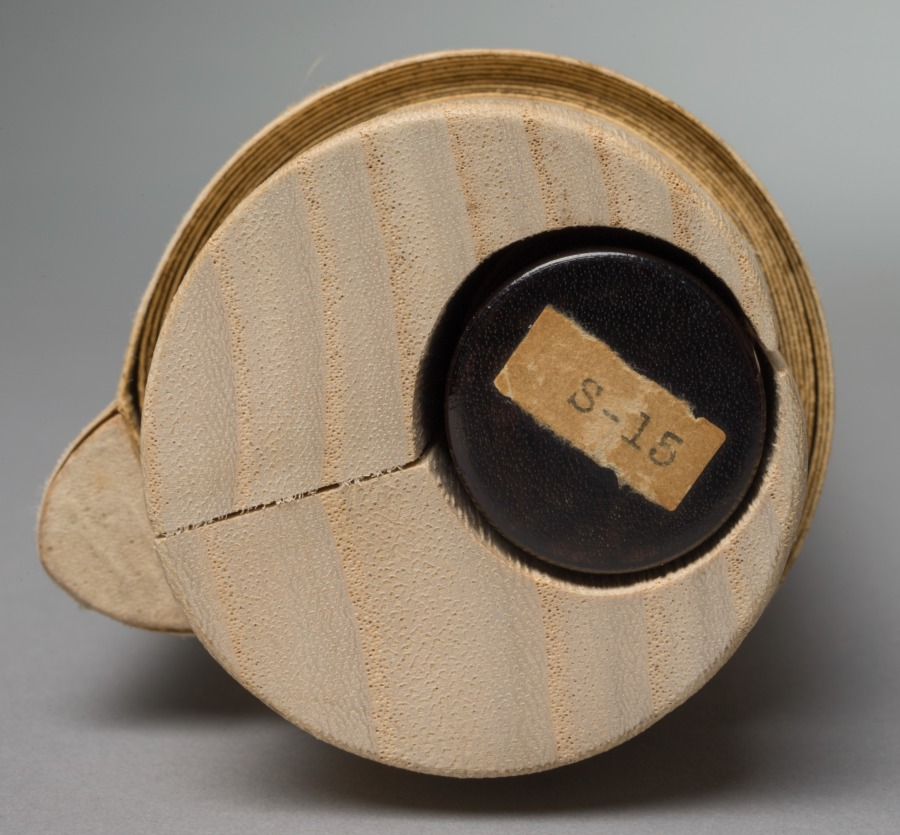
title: White-Robed Kannon (Byakue Kannon)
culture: Japan, Kamakura period (1185–1333)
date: c. 1200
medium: hanging scroll; ink on paper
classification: Painting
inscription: 箱書 石座観音 高山寺舊蔵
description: Kannon is a deity of mercy and compassion in the Buddhist faith. This monochrome sketch comes from Kōzan-ji, a temple in northwest Kyoto. The subdued ink tones and plain brushwork reflect the taste of Zen Buddhism, which began to have an impact on the visual arts in 13th-century Japan.